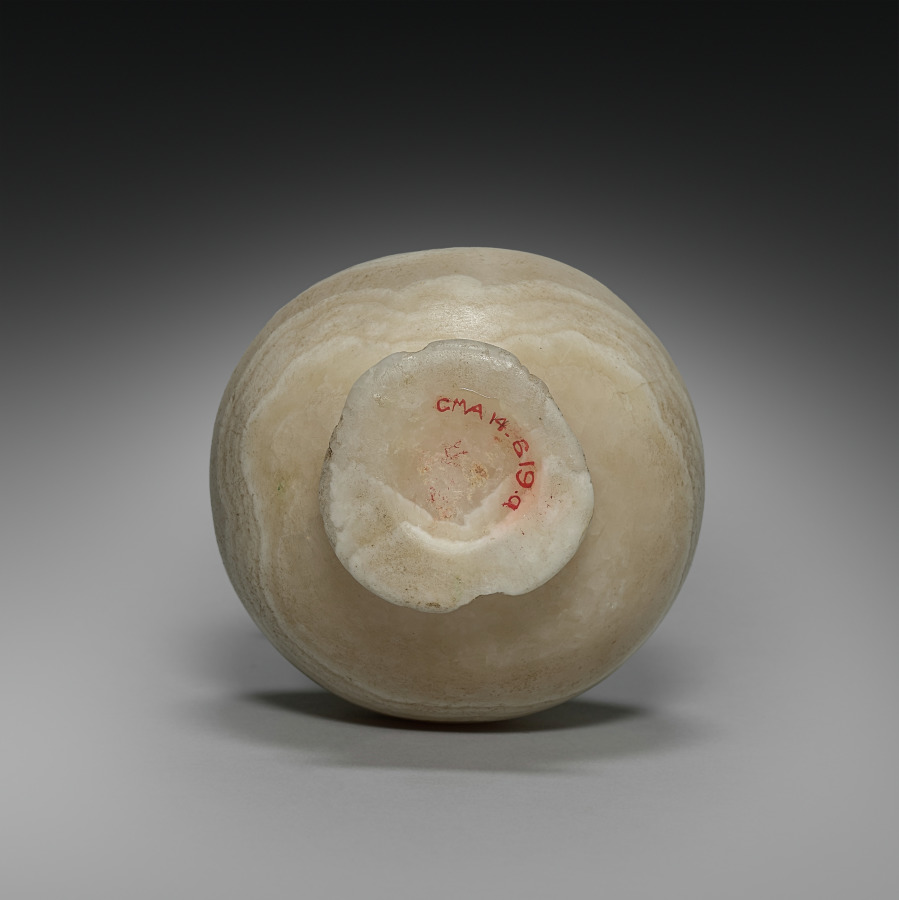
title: Long-Necked Flask with Lid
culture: Egypt, New Kingdom (1540–1069 BCE), Dynasty 18, reign of Tuthmosis III (1479–1425 BCE)–reign of Amenhotep III (1390–1352 BCE)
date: 1401–1353 BCE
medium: travertine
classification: Vessels